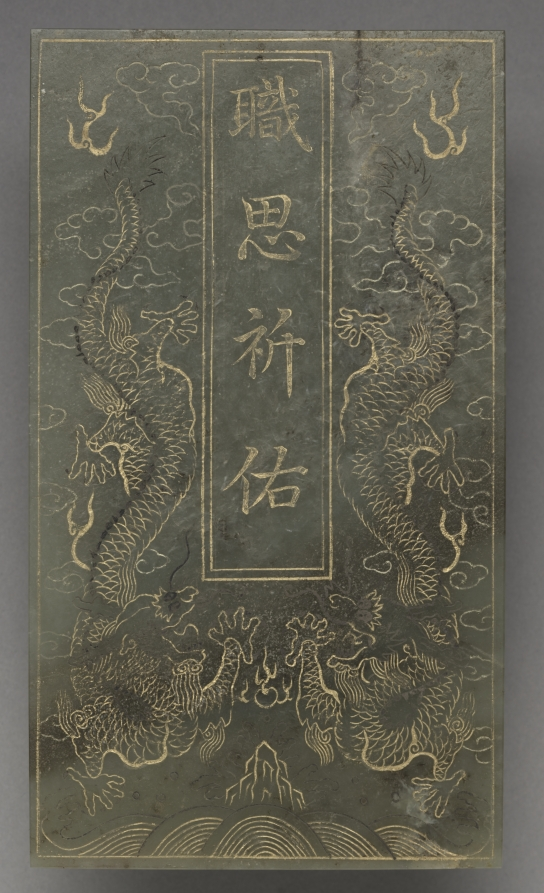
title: Tablet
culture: China, Qing dynasty (1644–1911), Qianlong reign (1736–95)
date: 1778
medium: jade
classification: Jade